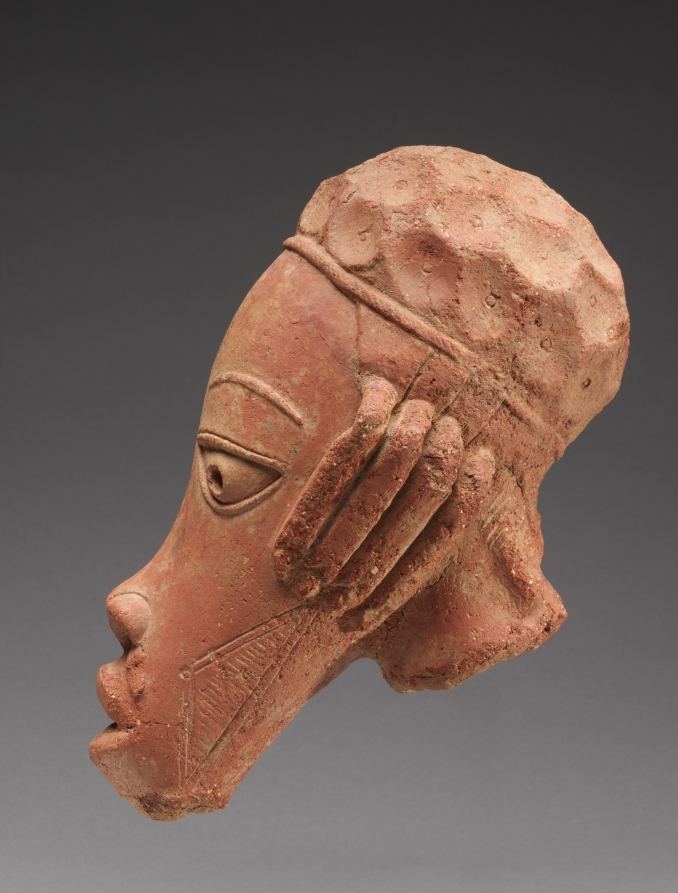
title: Head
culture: Africa, West Africa, Nigeria, Nok-culture style region, unknown female ceramicist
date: thermoluminescence date 20–620 CE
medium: terracotta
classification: Sculpture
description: More than 500 such sculptures—often full figures with elaborate hairstyles and jewelry— have been found in central Nigeria. Named after a discovery site, Nok culture (500 BCE–200 CE or 1500–1 BCE) produced the earliest large figurative artworks in Africa outside of Egypt. Little was known about their social context, as they were first found in mining deposits in the 1920s. Archaeological excavations conducted in the 2000s by a German-Nigerian team suggest that many sculptures were deliberately broken and placed under pavements and in pits, indicating ritual practice. Male-centered art histories presumed men made these figurative sculptures; however, they incorporate building and firing techniques practiced only by women.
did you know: This complete head’s bold modeling, deliberate asymmetry, and sensitive expression make it one of the finest known examples of Nok sculpture.